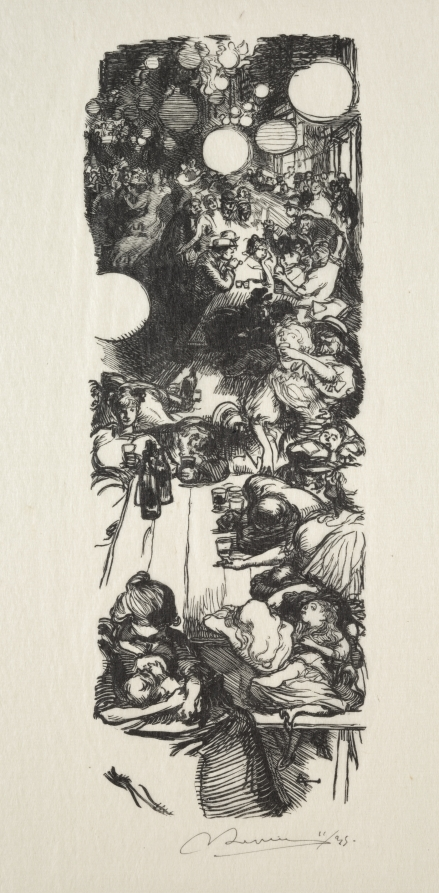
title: 14 Juillet, Rue de Belleville, minuit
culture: France, 19th-20th century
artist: Auguste Louis Lepère (French, 1849–1918)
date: 1889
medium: wood engraving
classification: Print